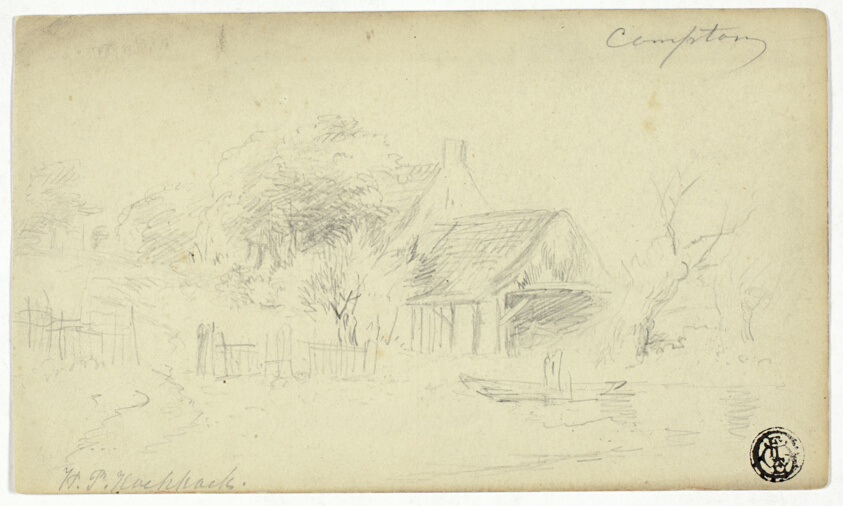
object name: Drawing and Watercolor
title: Compton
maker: Hendrik Pieter Koekkoek (Dutch, 1843-c. 1890)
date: c. 1877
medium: Graphite on ivory wove paper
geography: Holland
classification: graphite; drawings (visual works); prints and drawing